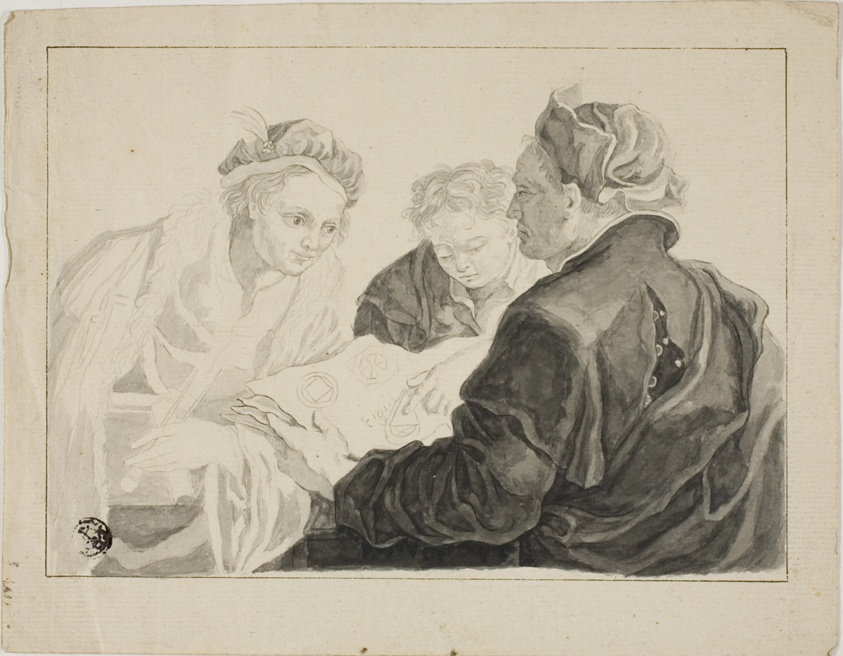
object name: Drawing and Watercolor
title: Architect Submitting Designs to Patron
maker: Francesco Fontebasso (Italian, 1707-1769)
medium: Pen and black ink, and brush and gray wash, on cream laid paper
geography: Italy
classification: ink or chalk wash; drawings (visual works); prints and drawing